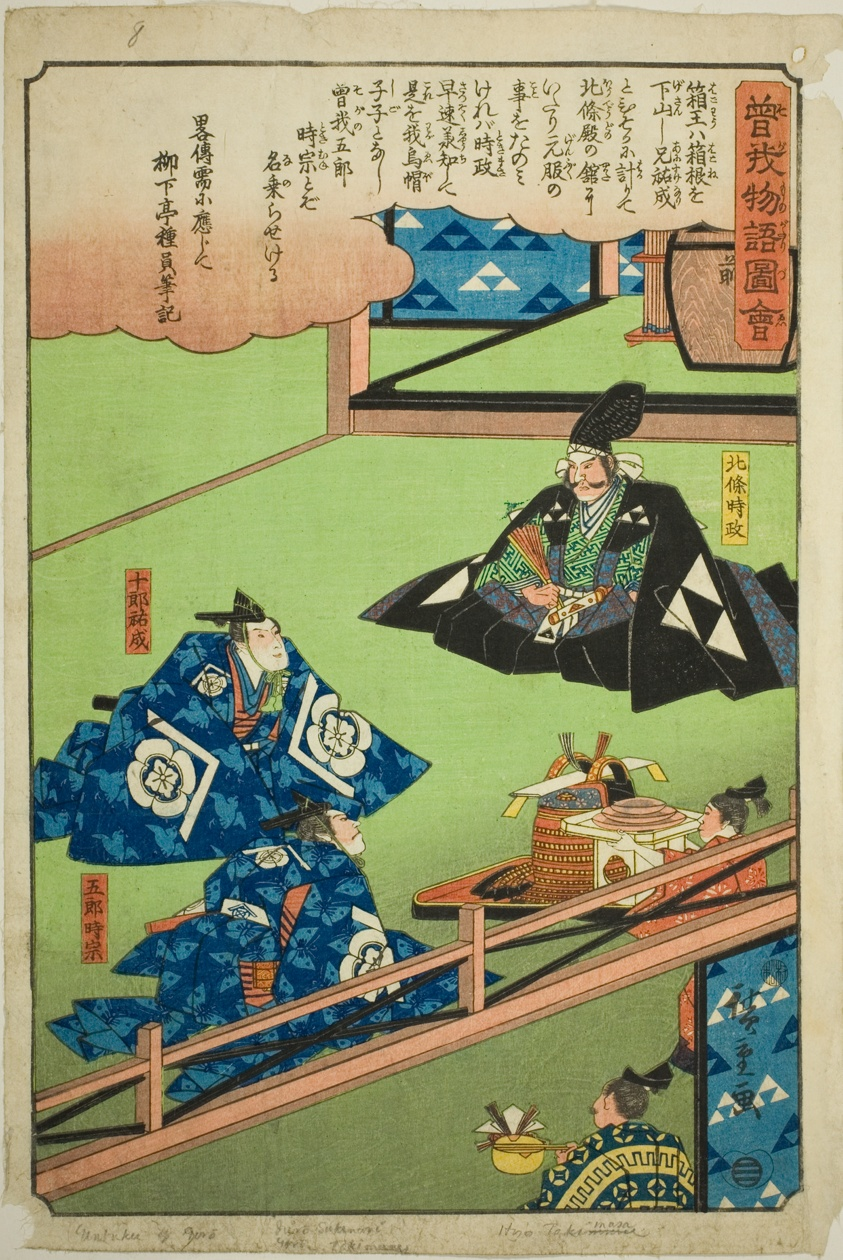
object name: Print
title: Hojo Tokimune and Soga no Juro Sukenari celebrate Goro's coming of age, from the series "Illustrated Tale of the Soga Brothers (Soga monogatari zue)"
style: Japanese (culture or style)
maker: Utagawa Hiroshige 歌川 広重; Japanese, 1797-1858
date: c. 1843/47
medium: Color woodblock print; oban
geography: Japan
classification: woodblock print; print; asian art